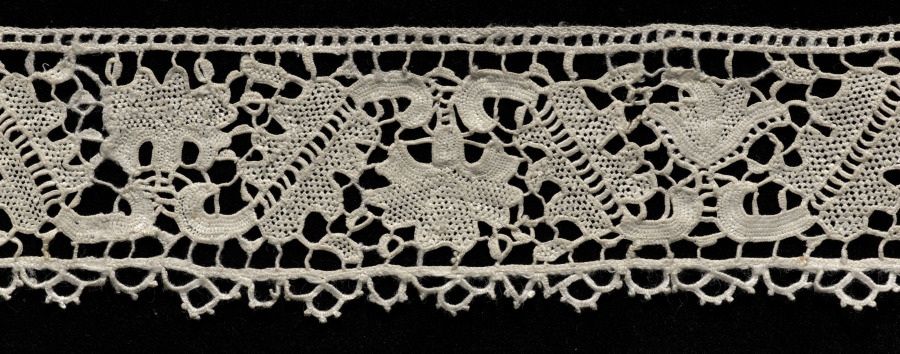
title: Lace Edging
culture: France(?)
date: 1800s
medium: Linen: needle lace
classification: Lace